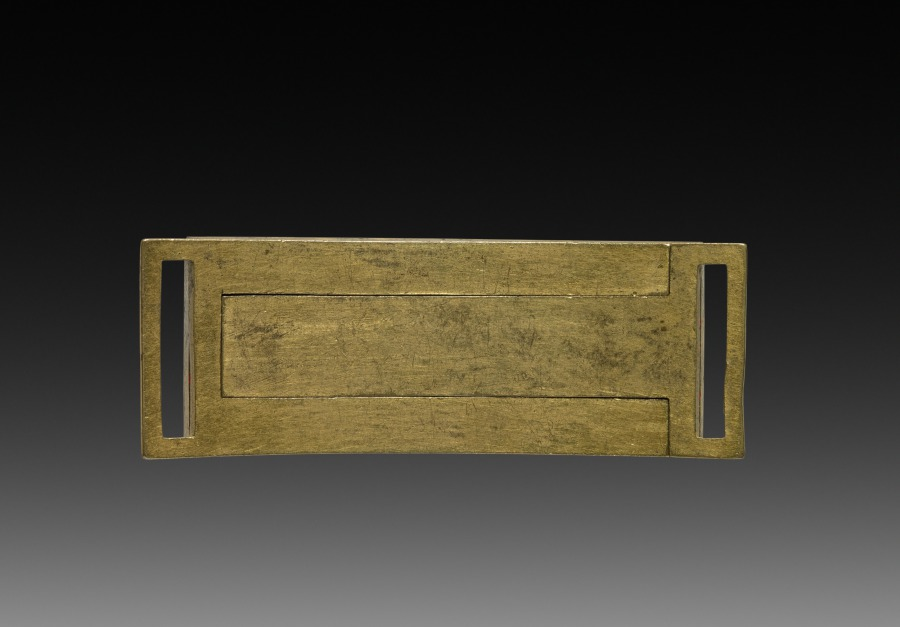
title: Buckle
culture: China, Qing dynasty (1644-1911) or Republican period (1912-49)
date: 1900s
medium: brass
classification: Jewelry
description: Each half of the buckle is decorated with a perforated dragon design.